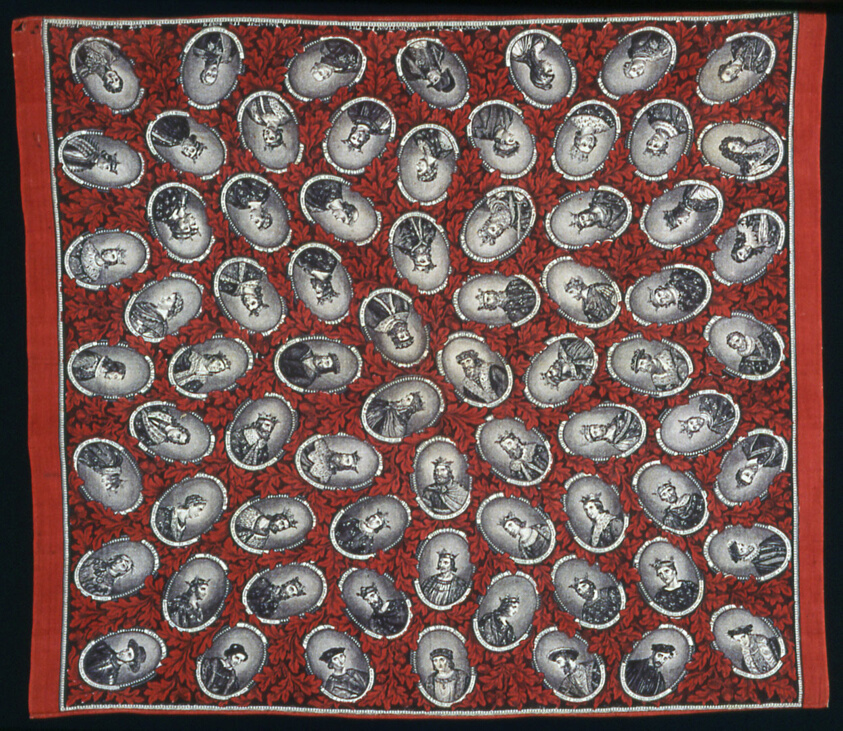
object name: Textile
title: Handkerchief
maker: Engraved by Raimond Laverdin (French, active 1830) after Francois Seraphin Delpech (French, 1778-1825); Manufactured Claude Arnaud Tizon (French, founded 1810); France, Rouen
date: 1830/48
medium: Cotton, plain weave; engraved roller printed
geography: Rouen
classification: textile; weaving - printed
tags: propaganda